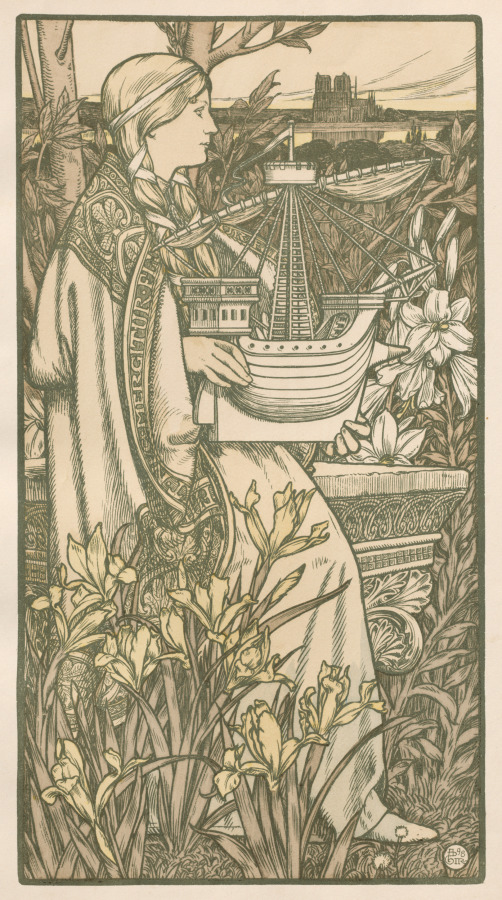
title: Lutèce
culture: France, Paris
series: L'Estampe Moderne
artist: Adolphe Giraldon (French, 1855–1933)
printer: Imprimerie Champenois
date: 1898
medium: Color lithograph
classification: Bound Volume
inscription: In plate: lower right corner of image: Ad 98 / GIR; lower right corner of sheet: blindstamp of l'Estampe Moderne (Lugt 2790)